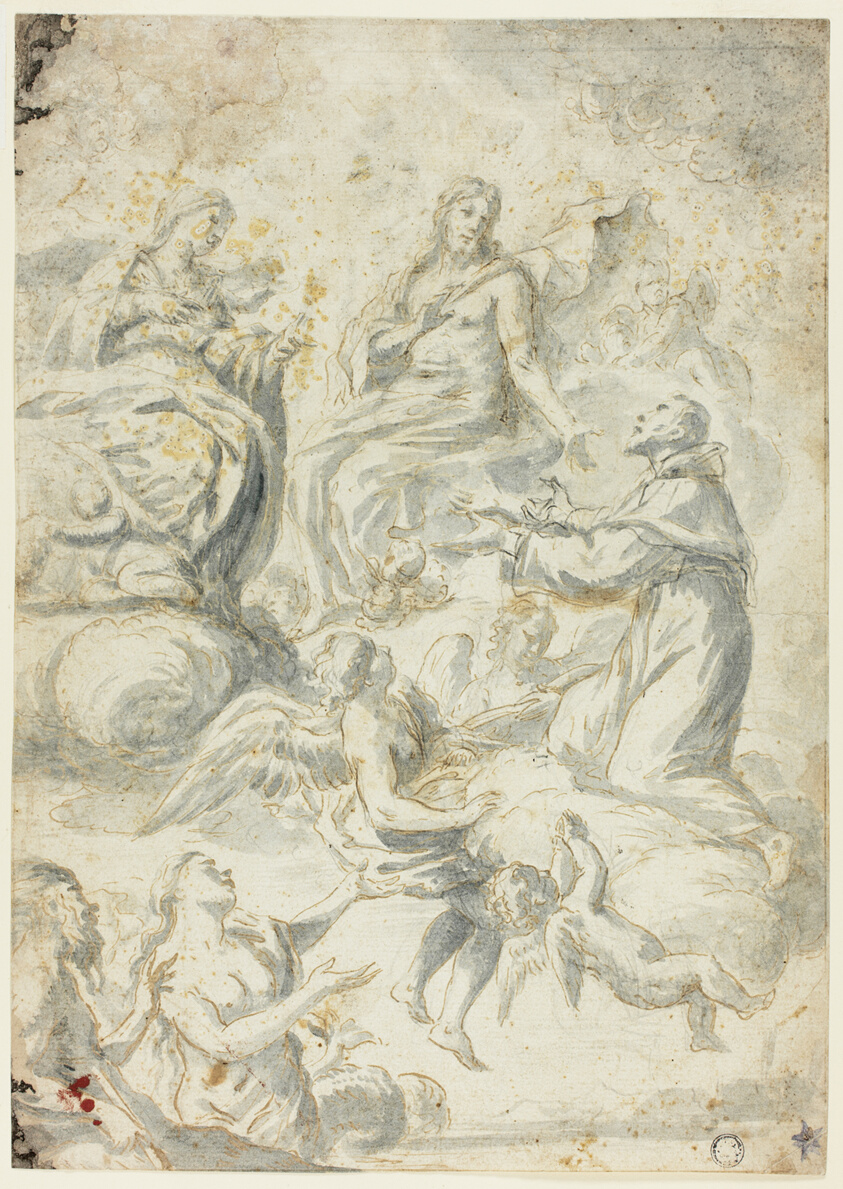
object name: Drawing and Watercolor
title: Saint Nicholas of Tolentino Interceding with Christ and Madonna for Souls in Limbo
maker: Possibly Pietro Antonio Novelli (Italian, 1729-1804); or Giovanni Battista Tiepolo (Italian, 1696-1770)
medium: Pen and brown ink, with brush and blue-gray wash, with traces of graphite on ivory laid paper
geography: Italy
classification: ink or chalk wash; drawings (visual works); prints and drawing